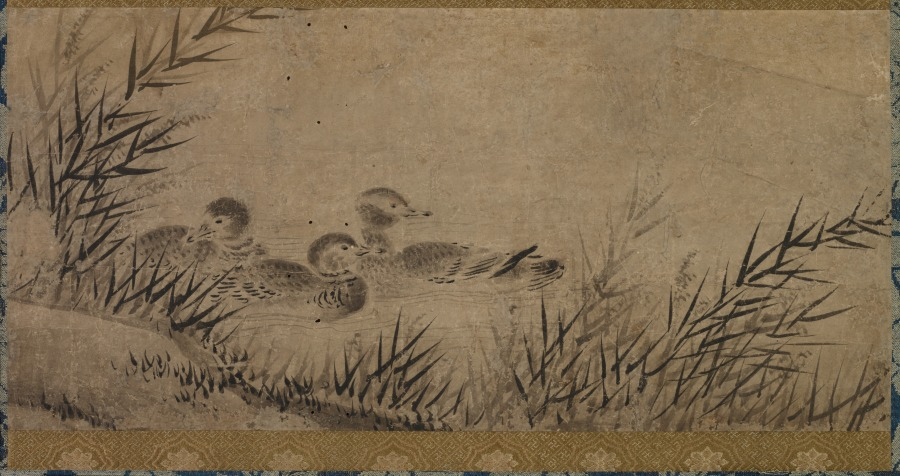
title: Ducks and Reeds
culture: Japan, Momoyama period (1573-1615) to Edo period (1615-1858)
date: early 1600s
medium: hanging scroll; ink on paper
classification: Painting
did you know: This painting was produced by a member of the Kano school.